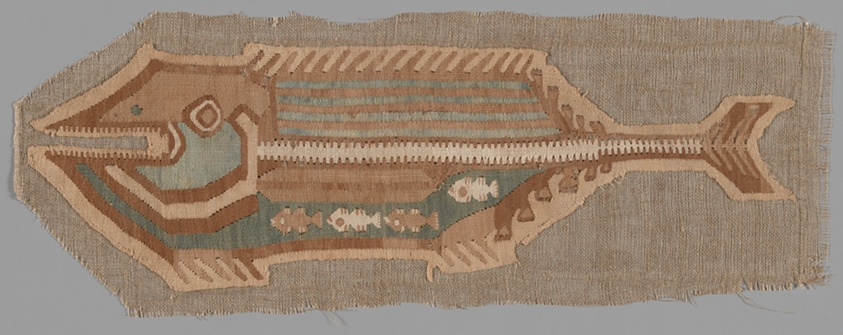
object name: Textile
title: Fish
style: Pre-Columbian, chancay, late intermediate period, americas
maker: Rimac (North coast, Peru)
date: 1000/1476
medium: Cotton, slit tapestry weave with eccentric wefts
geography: Peru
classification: textile; weaving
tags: animals, super/natural